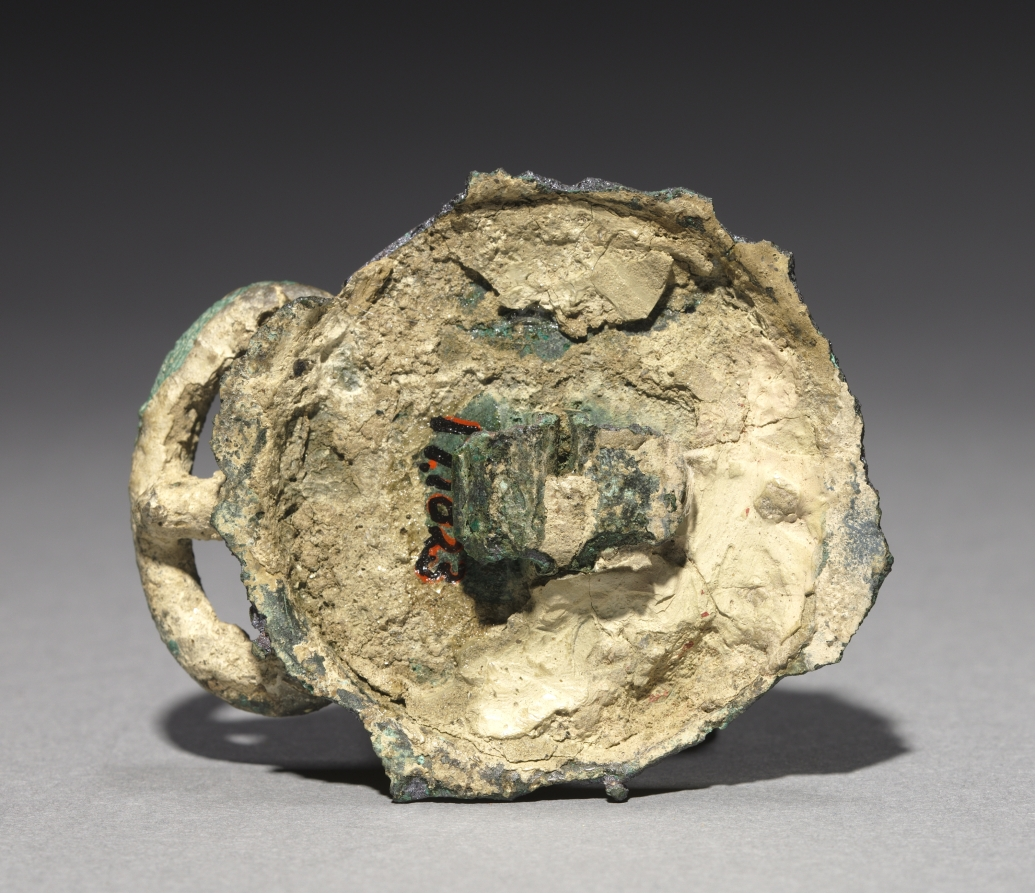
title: Belt Buckle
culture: Korea, Goryeo dynasty (918–1392)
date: 1100s-1200s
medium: Gilt bronze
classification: Metalwork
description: Metallurgy advanced remarkably in the Goryeo period (918–1392), explaining why a large quantity of sophisticated metal artifacts with delicate designs were used not only as daily accessories but also as burial goods. Once coated in brilliant gold, belt buckles like this one were fixed to leather belts.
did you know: The Japanese antique dealer Yamanaka & Company, which opened its branches in New York (1895) and Boston (1899), sold small Korean archaeological materials such as this belt buckle to American collectors in the early 20th century.